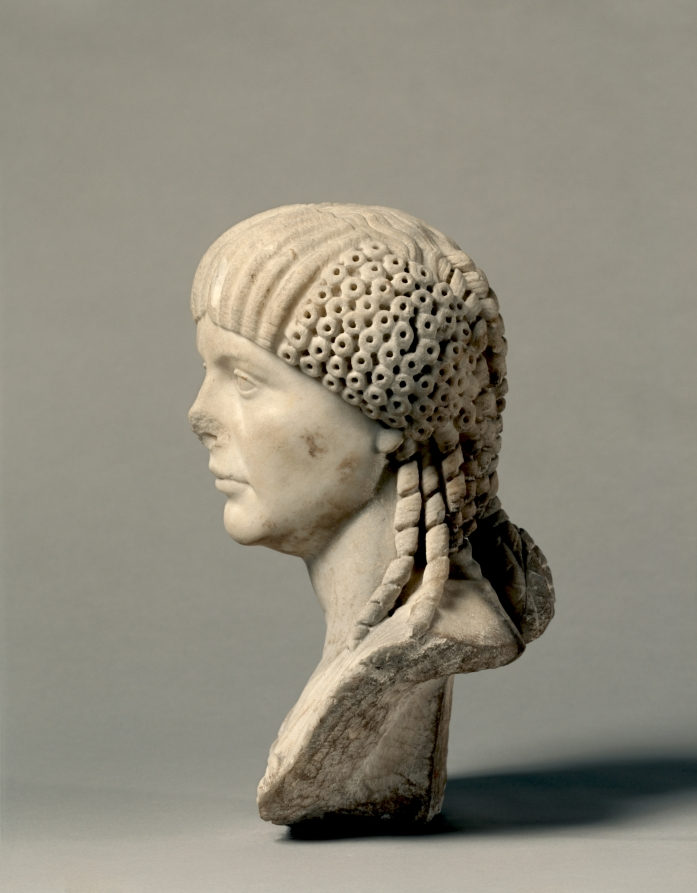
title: Portrait Bust of the Empress Claudia Octavia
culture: Italy, Roman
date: 50–70 CE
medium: marble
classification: Sculpture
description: This portrait bust depicts a young woman whose idealized features and elaborate hairstyle may identify her as the empress Claudia Octavia (r. AD 54-62), unfortunate first wife of the notorious emperor Nero. Over her tunic she wears a stola, a long garment hanging from both shoulders and distinguishing her as a married, upper-class woman. Although beloved by the Roman citizenry and described by the historian Tacitus as “aristocratic and virtuous,” Octavia was eventually divorced and banished by Nero, then ordered put to death.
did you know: The complex coiffure includes four elements: parted waves (top), tight curls (sides), hanging ringlets (shoulders, back), and a braided knot (back).